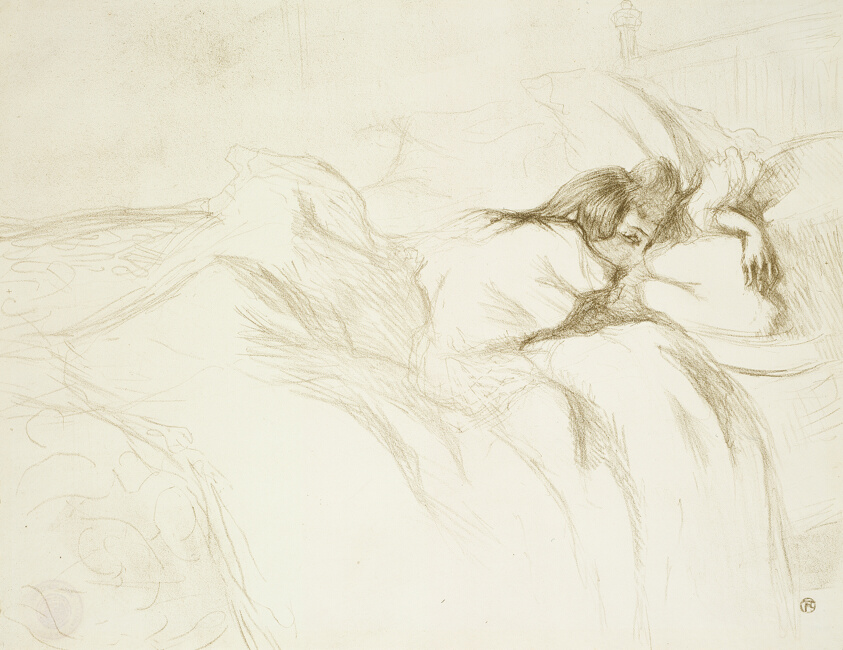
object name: Print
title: Woman in Bed—Waking, plate three from Elles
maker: Henri de Toulouse-Lautrec (French, 1864-1901); published by Gustave Pellet (French, 1859-1919); probably printed by Auguste Clot (French, 1858-1936)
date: 1896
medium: Color lithograph on ivory wove paper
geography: France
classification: lithograph; print; prints and drawing